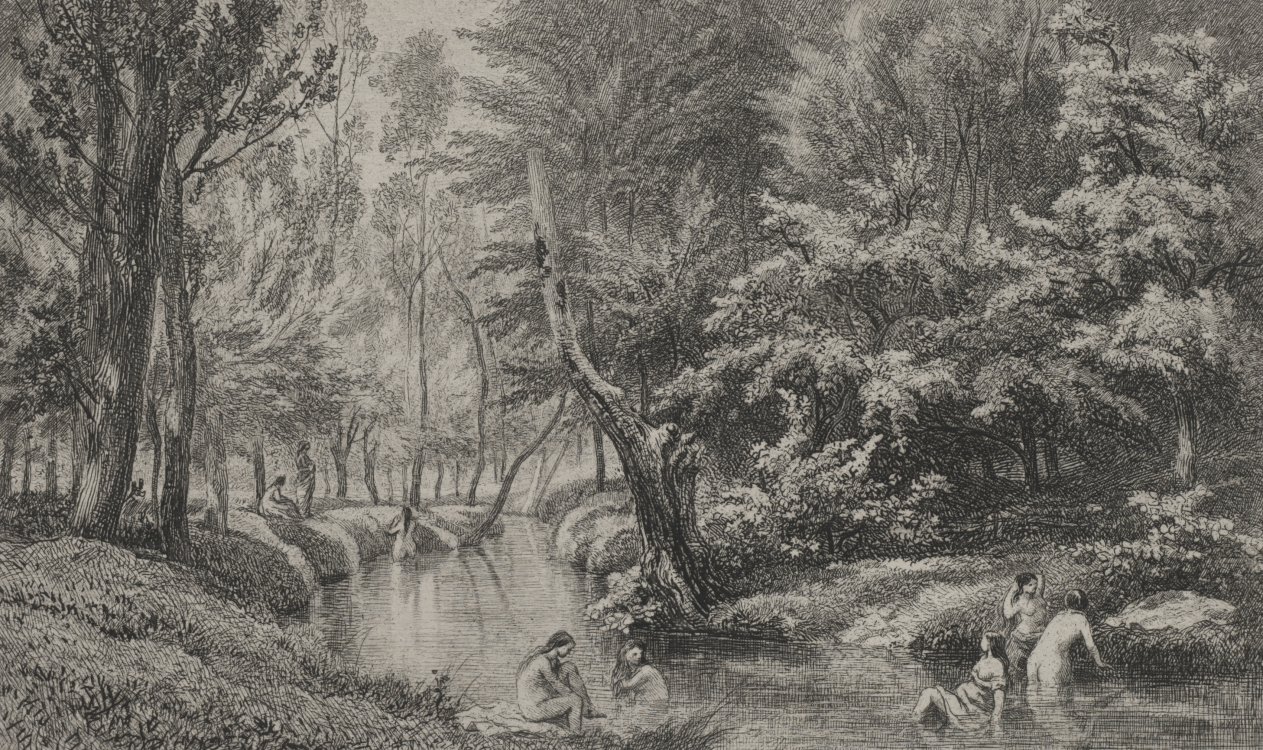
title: The Bathers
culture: France, 19th century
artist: Charles François Daubigny (French, 1817–1878)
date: c. 1847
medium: etching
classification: Print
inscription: signed, lower left, in plate: C. Daubigny inv. 18